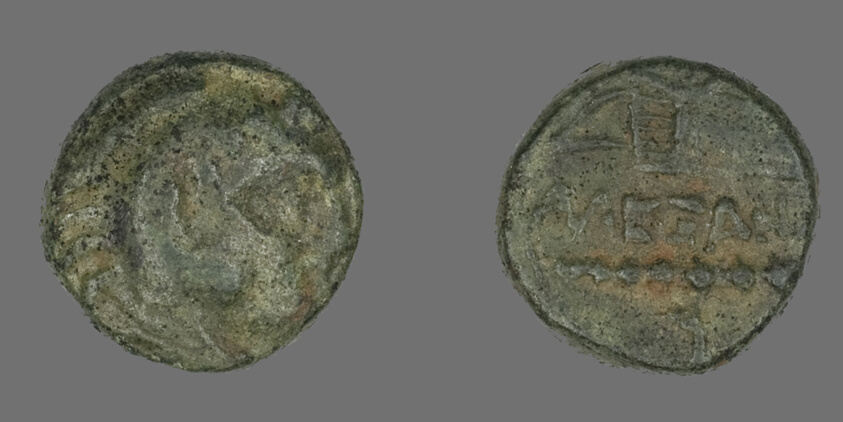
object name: Coin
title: Coin Depicting the Hero Herakles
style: greek, ancient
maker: Greek; Macedonia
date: 336-323 BCE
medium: Bronze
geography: Ancient Greece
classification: coin; ancient art